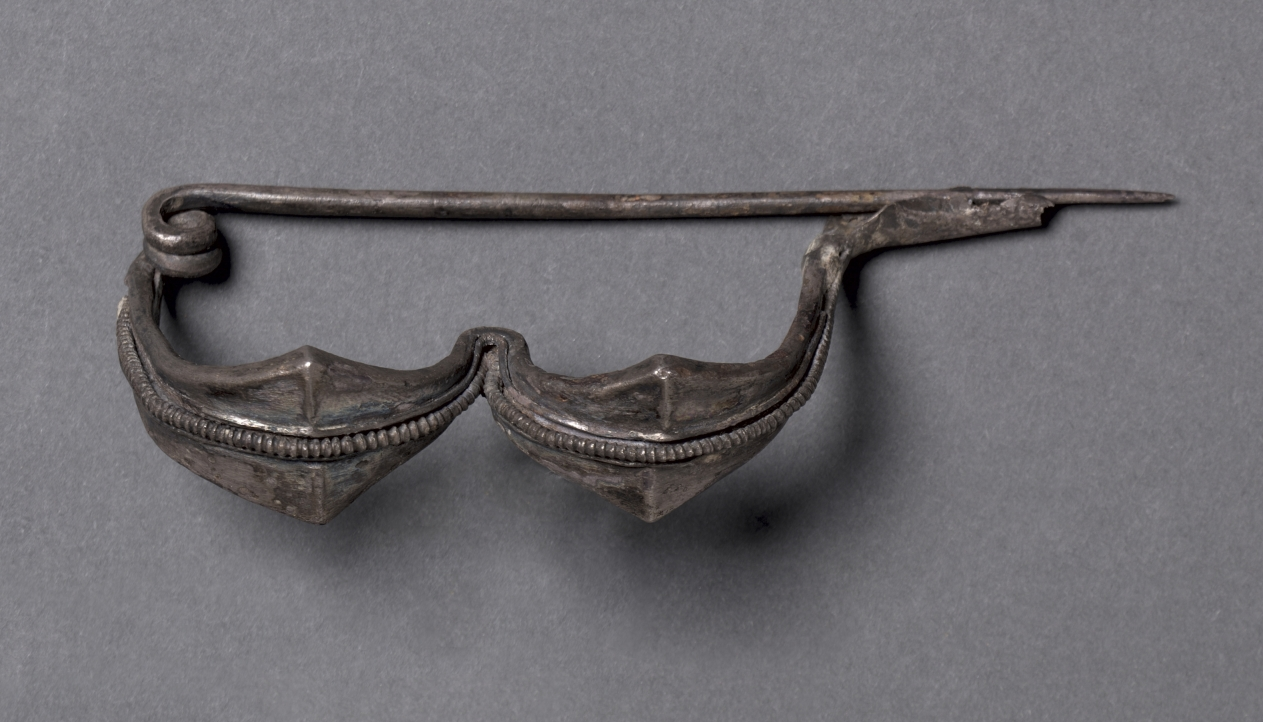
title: Boat-Shaped Fibula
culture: Italy, Florence (?)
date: 400–100 BCE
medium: silver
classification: Jewelry